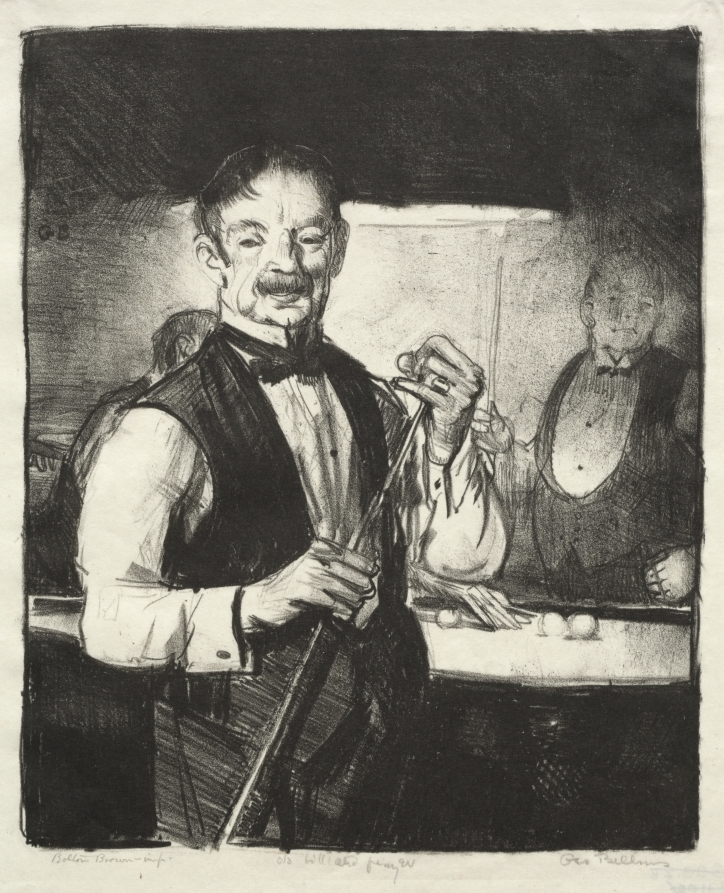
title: Old Billiard Player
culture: America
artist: George Bellows (American, 1882–1925)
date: 1921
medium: lithograph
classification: Print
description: An avid billiards fan, Bellows enjoyed playing matches among a circle of close friends that included his valued colleague and former painting instructor Robert Henri. Despite the careful characterization of the titular figure in this print, his identity remains unknown.